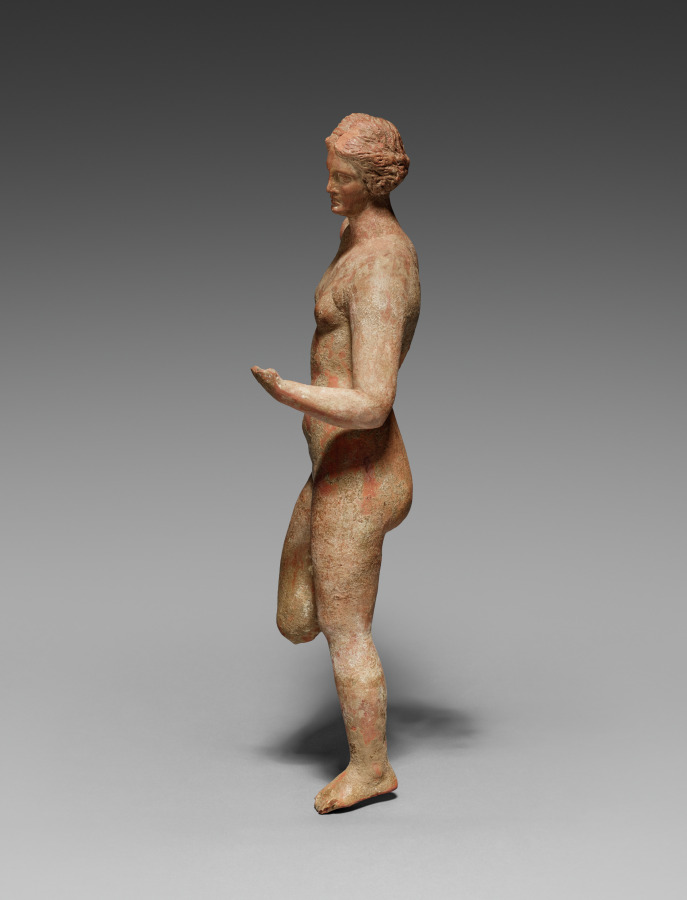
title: Aphrodite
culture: Greece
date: 400–200 BCE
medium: terracotta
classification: Sculpture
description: This nude figurine was likely inspired by the Aphrodite of Knidos by Praxiteles, a work that spawned countless reproductions of varying sizes in different media. Created from inexpensive terra cotta clay, this Aphrodite might have been commissioned as a votive offering by a person of modest means.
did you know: This Aphrodite may be admiring her reflection in a mirror once held in her left hand.